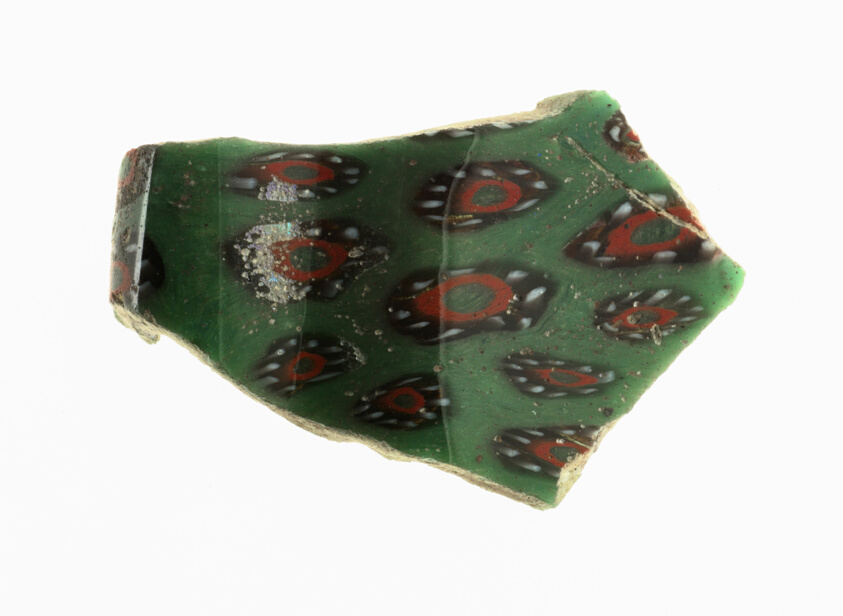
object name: Decorative Arts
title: Fragment of a Cup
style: roman (ancient, style or period), ancient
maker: Roman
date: 1st century BCE–1st century CE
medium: Glass, mosaic glass technique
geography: Roman Empire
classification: fragment; drinking vessel; decorative arts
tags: decoration